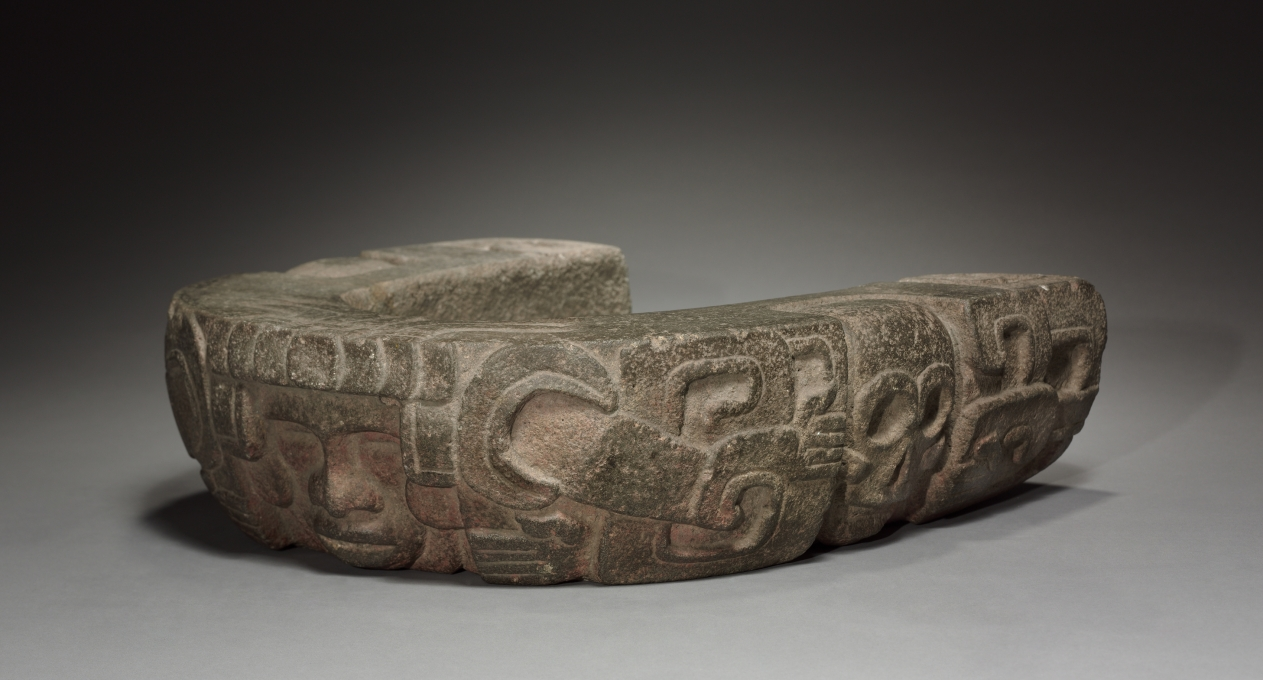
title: Yoke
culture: Mexico, Classic Veracruz Style, 7th-10th Century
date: c. 600–900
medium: stone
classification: Sculpture